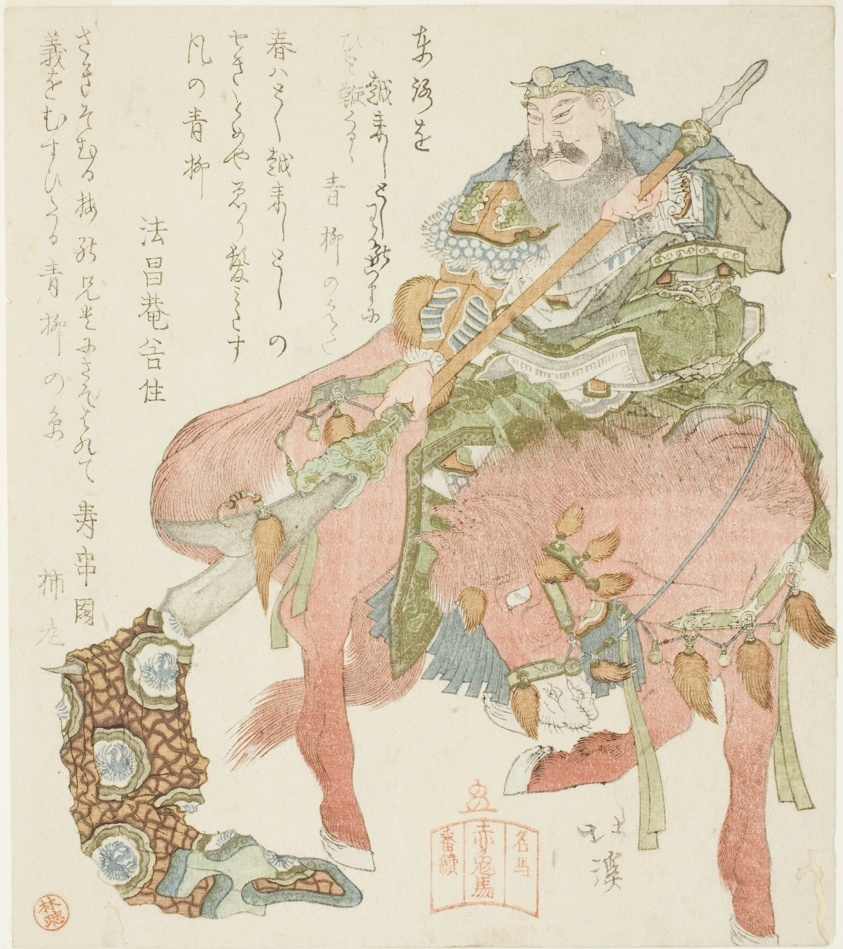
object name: Print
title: The Horse Sekitoba and the General Guan Yu (Jp: Kan'u), from the series "A Series of Famous Horses (Meiba bantsuzuki)"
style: Japanese (culture or style)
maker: Totoya Hokkei (Japanese, 1780-1850)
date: 1822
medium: Color woodblock print; shikishiban, surimono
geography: Japan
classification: woodblock print; print; asian art